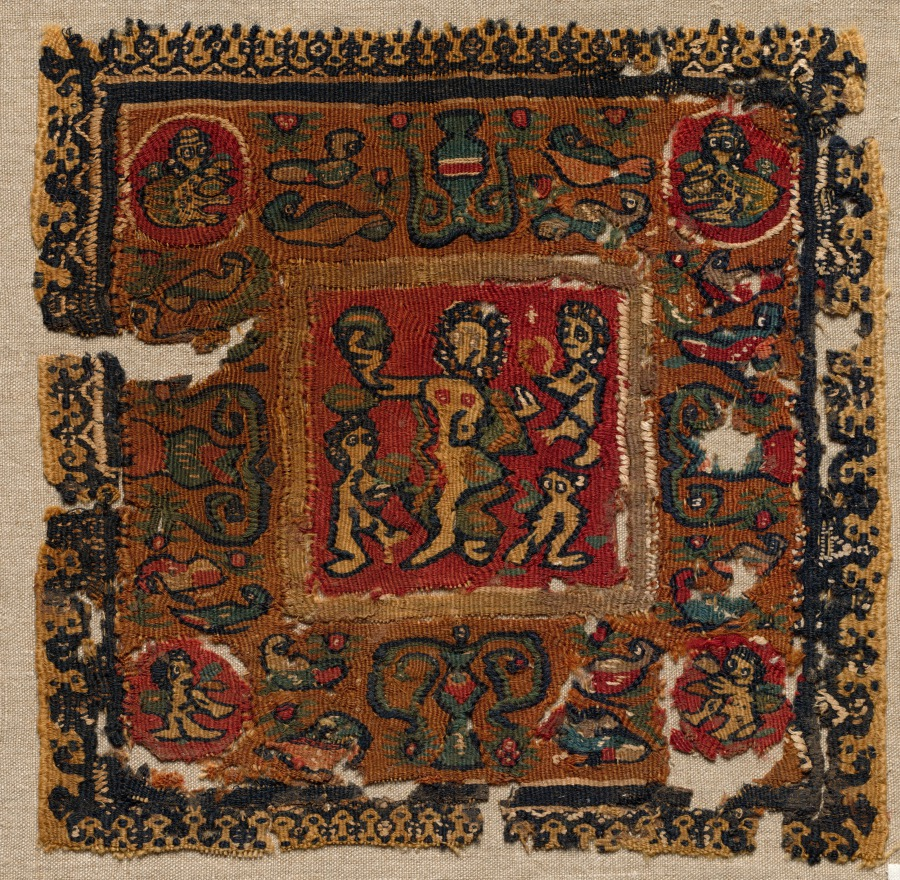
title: Segmentum from a Tunic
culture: Egypt, Byzantine period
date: 400s - 600s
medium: tapestry (originally inwoven in tabby ground); wool and linen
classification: Textile